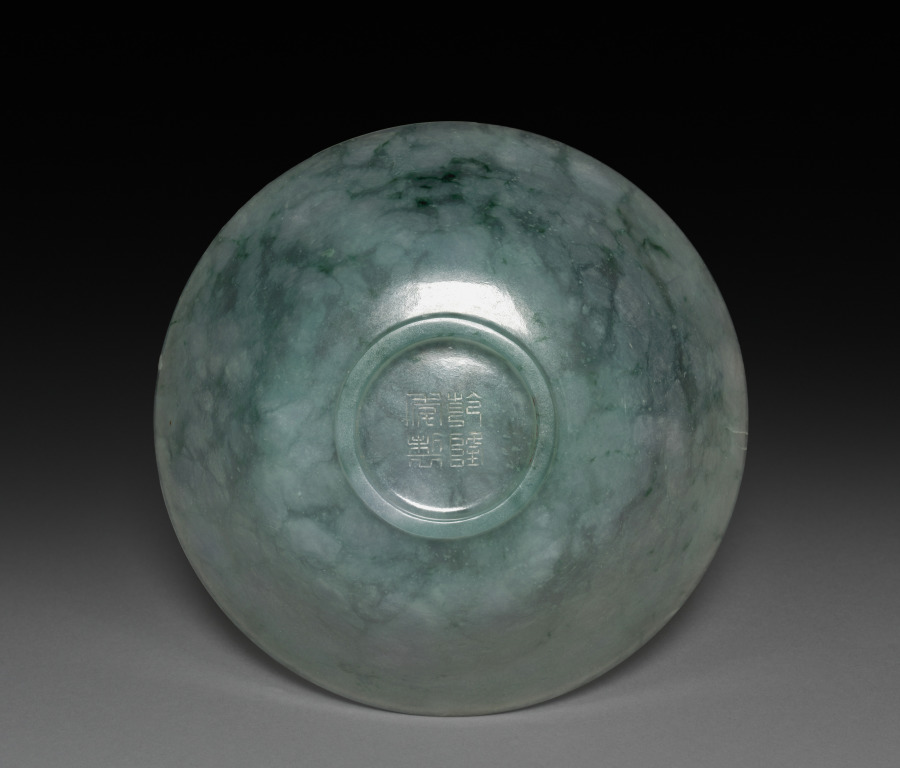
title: Bowl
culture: China, Qing dynasty (1644–1911), Qianlong reign (1736–95)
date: 1736–95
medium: jade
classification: Jade